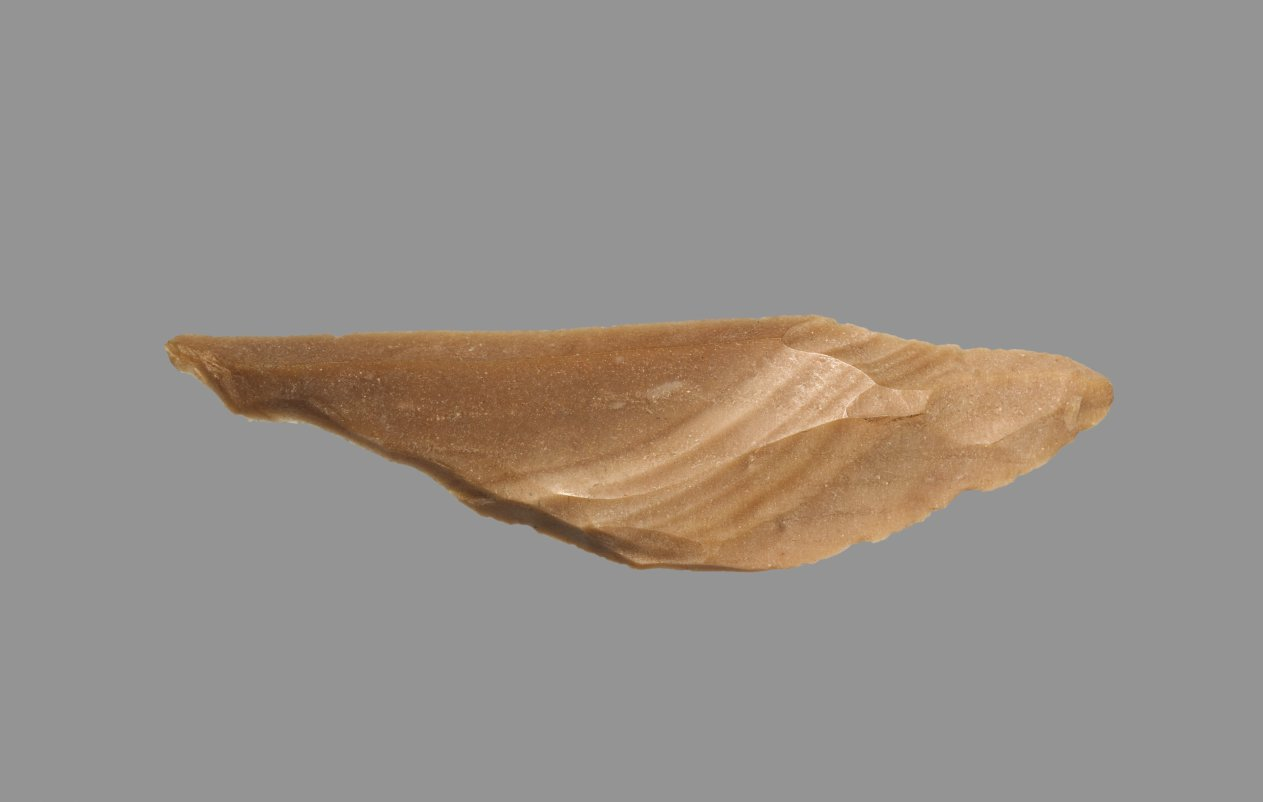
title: Sickle Blade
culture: Egypt, Middle Kingdom (2040–1648 BCE), Dynasty 12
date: 1980–1801 BCE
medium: flint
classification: Implements